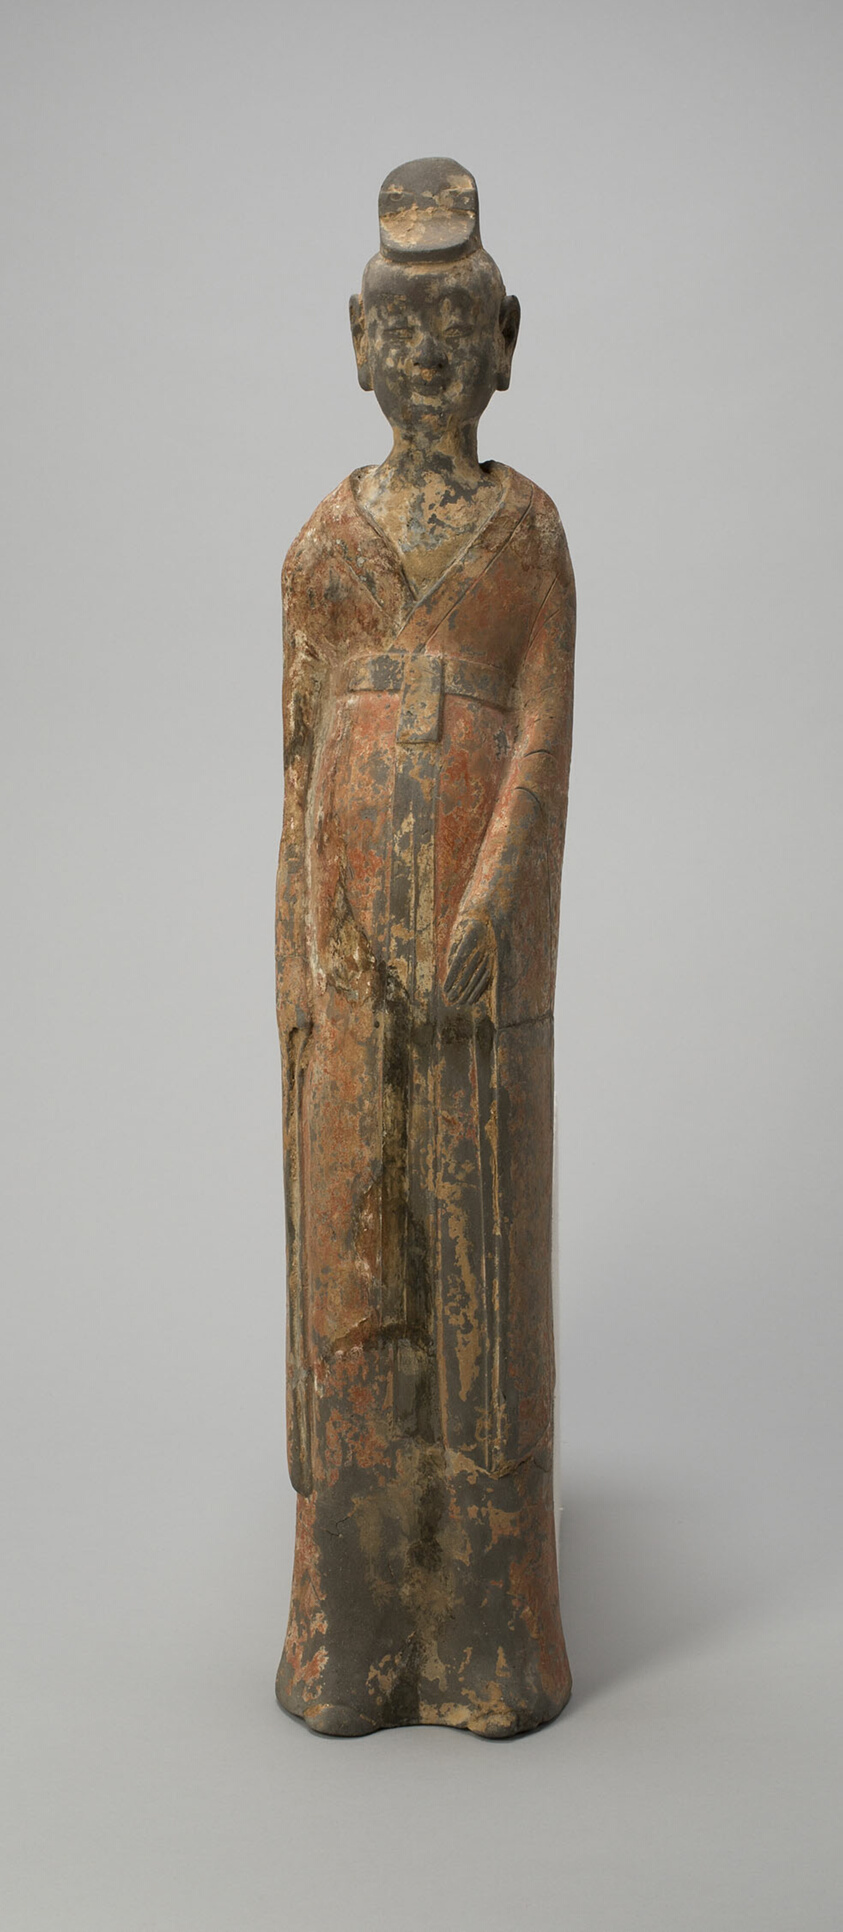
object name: Sculpture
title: Courtier (Tomb Figure)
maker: China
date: Northern Wei (386-535), early 6th century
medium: Earthenware with traces of polychromy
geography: China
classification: ceramics; asian art